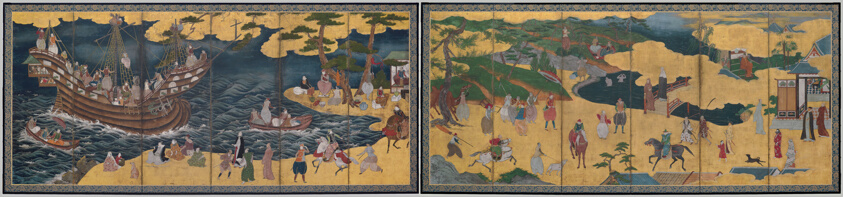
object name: Furniture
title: Southern Barbarians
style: Japanese (culture or style)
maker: Artist unknown; Japanese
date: mid 17th century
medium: Pair of six-panel screens; ink, colors, and gold on paper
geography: Japan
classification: furniture